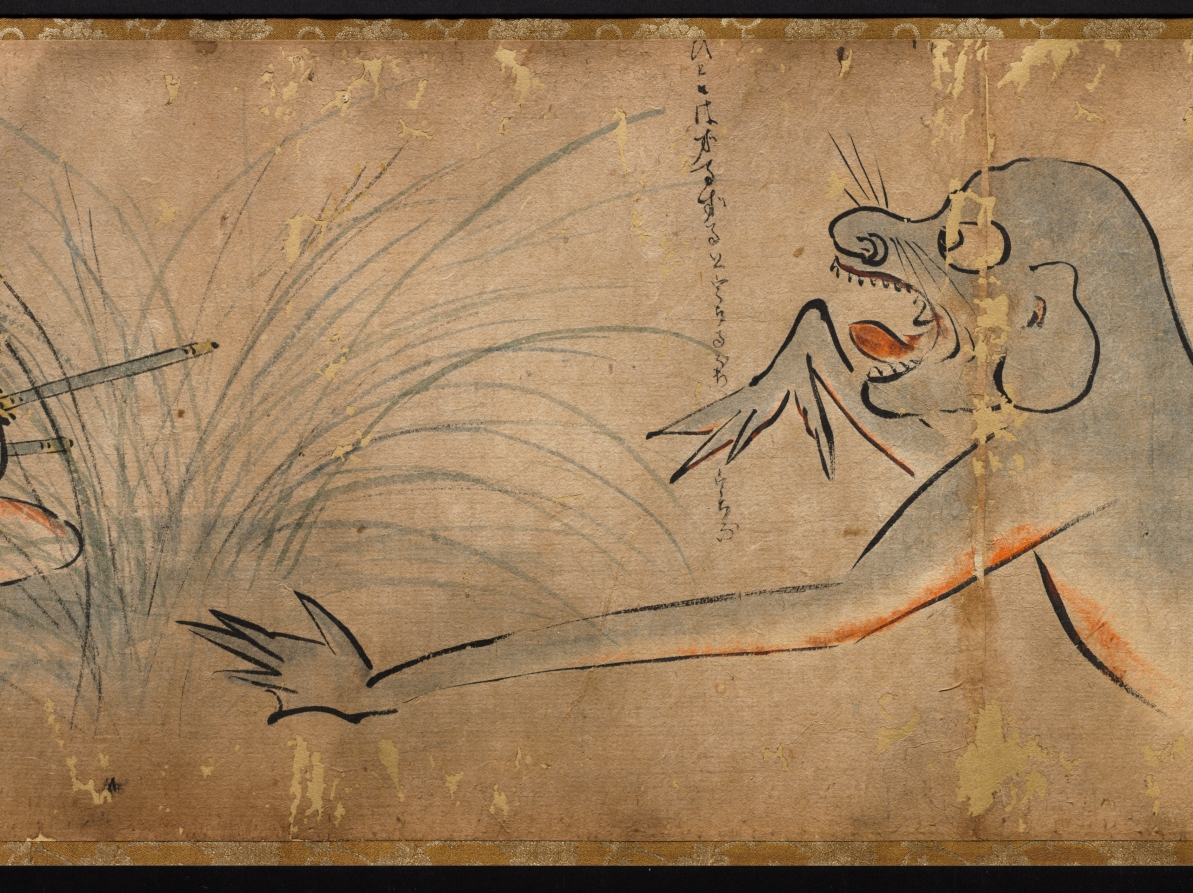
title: The Illustrated Tale of Oishi Hyōroku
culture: Japan, Edo period (1615–1868)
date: 1700s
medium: handscroll; ink and color on paper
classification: Painting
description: This incomplete handscroll illustrates part of the story of Oishi Hyoroku, a young man tasked with battling fox apparitions who were creating problems in his town. In other extant versions of the scroll, the story is set in the fall of 1624 in Kagoshima in southern Japan. Throughout the story, Hyoroku is tricked and terrified by the foxes that shift their shapes into a variety of monstrous phantoms. After repeated humiliations, he eventually captures two of the foxes. In this version, colloquial texts that function like text blurbs in comics appear throughout the scroll, but the main text is missing.